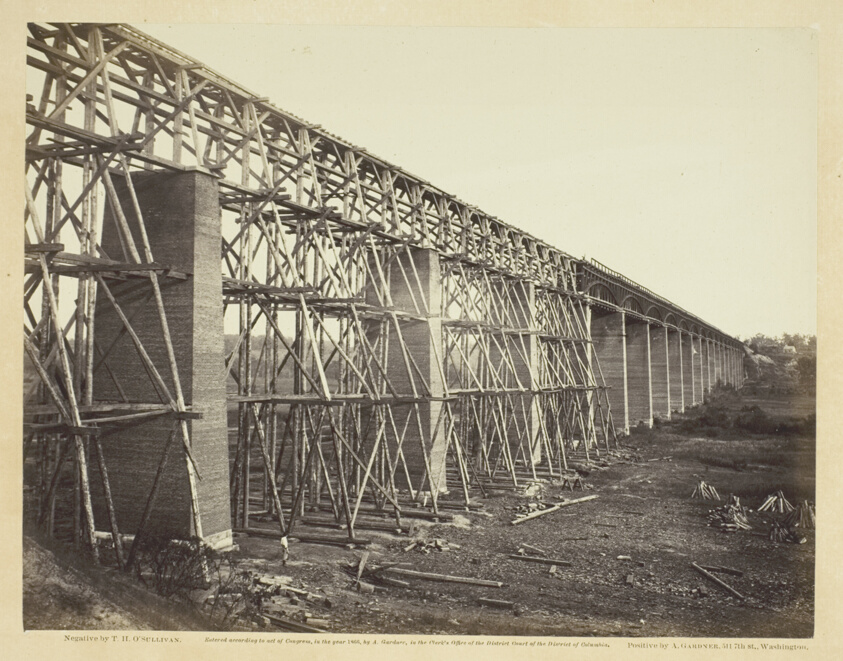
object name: Photograph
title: High Bridge Crossing the Appomattox, Near Farmville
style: 19th century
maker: Timothy O'Sullivan (American, born Ireland, 1840–1882)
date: 1865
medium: Albumen print, pl. 98 from the album "Gardner's Photographic Sketch Book of the War, Volume II" (1866)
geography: United States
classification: photograph; albumen silver print; photography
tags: Collected by Hugh Edwards, Gardner's Photographic Sketch Book